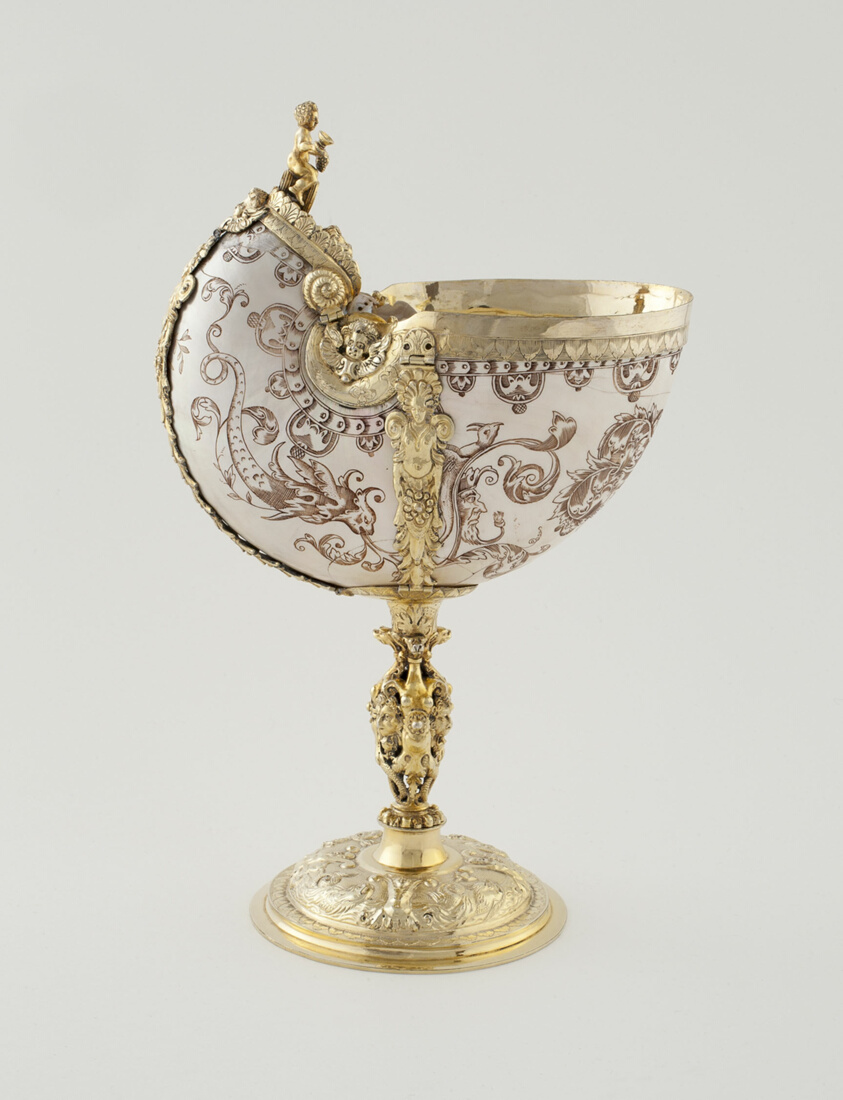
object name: Decorative Arts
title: Nautilus-Shell Cup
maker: German, Augsburg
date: c. 1600/1700 (19th century mounts)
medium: Nautilus-shell cup and silver gilt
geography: Augsburg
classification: silver; metalwork; european decorative arts; decorative arts